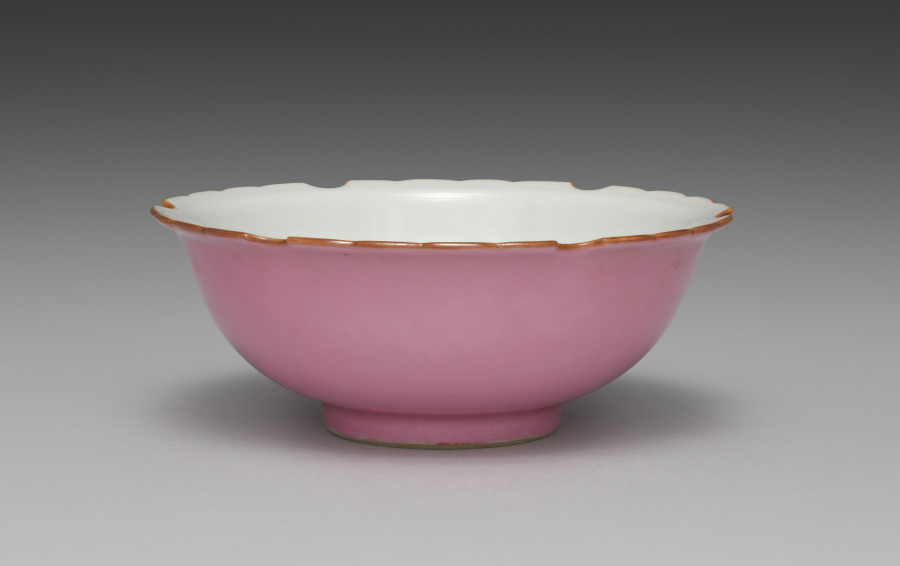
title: Dish from Snow-Flake Side Dishes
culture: Japan, Meiji period (1868–1912)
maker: Seifū Yohei III (Japanese, 1851–1914)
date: 1893–1914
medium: One from a set of six porcelain dishes; porcelain with lobed rims and pink glaze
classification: Ceramic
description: According to the box lid, this set of six side dishes, or mukōzuke, are “snow-flower style” (sekkashiki), having mouths shaped like snowflakes. Their mouths, which have six lobes and scalloped edges, are traced with brown iron oxide at the rim. The outside of each bowl is glazed with a very bright pink over the basin and foot, and the inside is left white. From directly above, one sees a snowflake-like shape, and from the side, they seem to float above a rosy ground.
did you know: The box for this set of dishes has an inscription on the side noting that they were for a person with the family name Nakamoto.